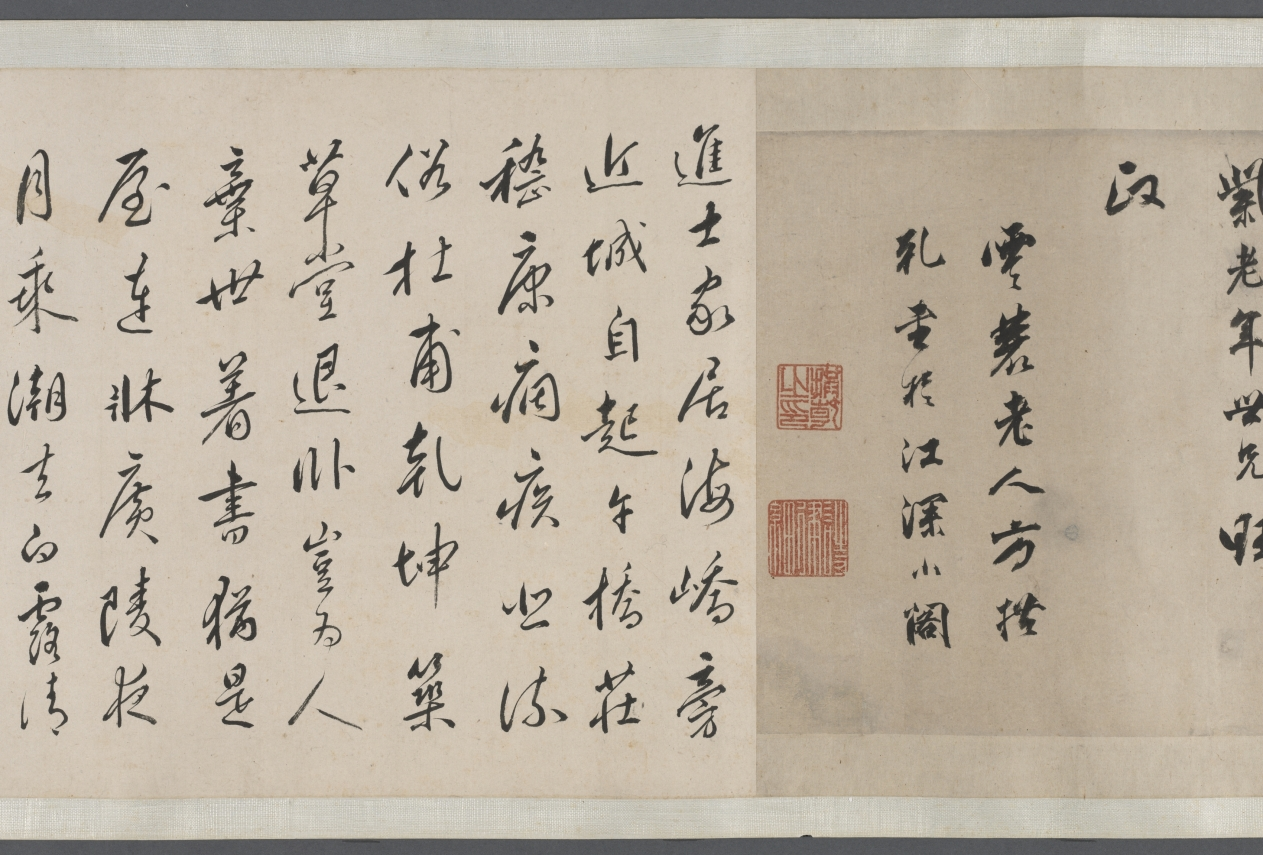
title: Spring Rain Thatched Hut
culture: China, Qing dynasty (1644-1911)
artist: Wang Jianzhang (Chinese, active 1621–1662)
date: 1650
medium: handscroll, ink on paper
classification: Drawing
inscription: Title by Wu Zhiying 吳芝瑛 (1868–1933), dated 1910.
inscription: 春雨草堂圖。庚寅仲春，為紫玄社兄畫於若耶溪上。 仲初王建章。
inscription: 12 colophons by Gong Weiliu’s 宮偉鏐 (1611–1680) contemporaries: Fang Gongqian 方拱乾 (1596–1667, jinshi of 1628); Jiang Cai 姜埰 (1607–1673); Liang Yizhang 梁以樟 (1608–1665); Du Shaokai 杜紹凱 (also named Du Jie 杜岕, 1617–after 1689), dated 1648; Zhao Kaixin 趙開心 (d. 1663), dated 1647; Zhao Erbian 趙而忭 (d. 1658); Yu Yaoguang 余耀光, dated 1649; Yao Quan 姚佺, dated 1648; Chen Taisun 陳台孫 (b. 1611, jinshi of 1640); (Monk) Shao 韶; Du Zhujin 杜祝進; and Tang Shi 唐時.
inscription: 此研田莊居士王建章為先太史紫元公所作春雨草堂圖也。居士字仲初，明崇禎間人，與先太史及惲香山相友善。喜畫佛像，自謂不讓李公麟。山水祖述董源，筆力雄健，有不可羈勒之概。香山稱其墨有五采，非世人所知。然性廉重，非同志不輕落筆，人得其寸圖尺縑，必相與忻賞，如獲蜼彝兕敦，非人世間物也！見先太史筆記，此圖寫雨景，而氣韻生動，勃勃於不能止。每一展覽，覺滿紙雲烟，墨瀋猶濕，如寫吾先人胸中未盡之邱壑也。圖後題詠，多一時名手，想見文采風流之盛。迄今二百餘年，舊德先疇，遺風未沫。吾子孫其永寶之，如與吾先人接謦咳於一堂，為感思之助，其敢作圖畫觀乎！同時香山亦有圖佚去己久，不知異日能為延津之合否。壬申長夏本昂重裝敬識。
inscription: Collectors' seals including: Gong Ben'ang 宮本昂 (1821–1874); Lian Qian 廉泉 (1868–1932); Wu Zhiying 吳芝瑛 (1868–1933)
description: With its striking simplicity, this painting captures the pure serenity of a private garden in the moist atmosphere of a spring morning on a small river. Painted in the style of Ni Zan, Wang Jianzhang dedicated this work to his patron-friend Gong Weiliu (1611-1680). Gong retired from government service after the fall of the Ming dynasty and constructed a garden-retreat at his native home in Taizhou, Jiangsu province. He invited scholars and poets from his literary society to contribute writings of his estate, which are here mounted together with the painting in this scroll.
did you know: Gong Weiliu, the owner of the estate portrayed here, had received his prestigious jinshi degree in 1643, but his official career was thwarted by the collapse of the Ming dynasty the following year.